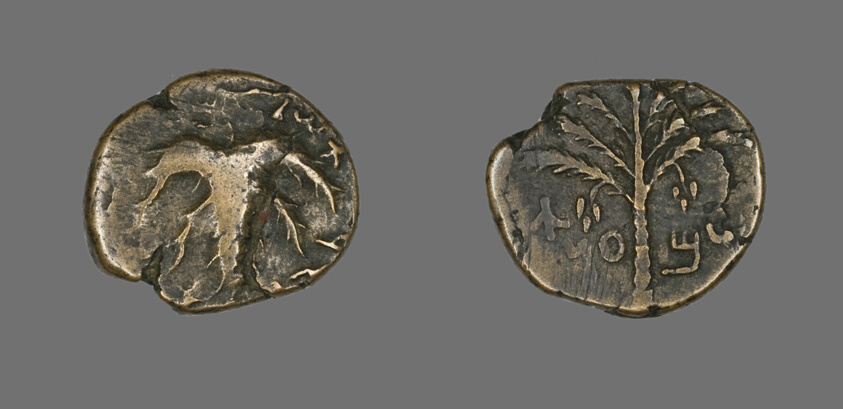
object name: Coin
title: Coin Depicting a Seven-Branched Palm Tree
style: ancient, roman (ancient, style or period)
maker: Judaean, Bar Kokhba Revolt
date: 134-135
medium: Bronze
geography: Israel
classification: coin; ancient art